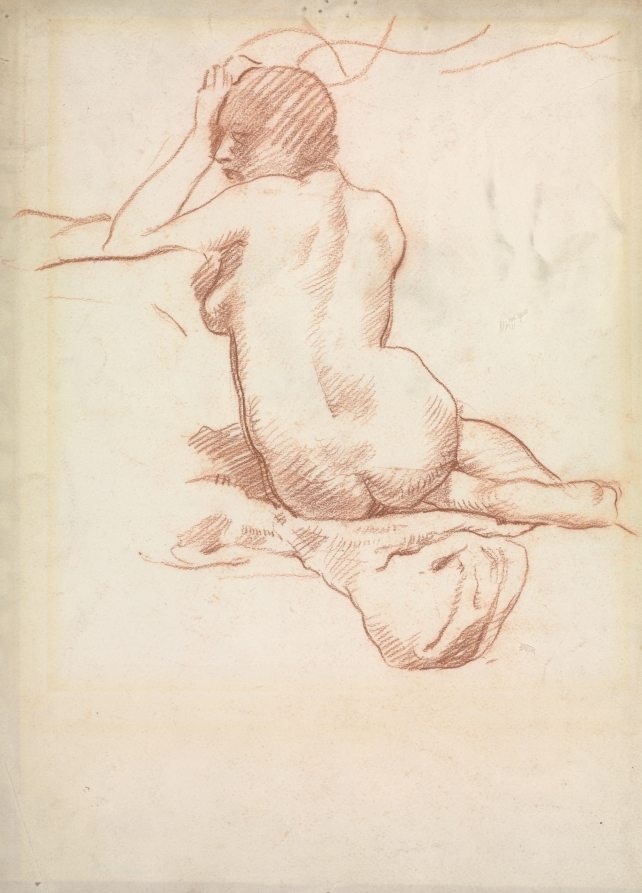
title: Seated Female Nude from the Rear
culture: England(?), 20th century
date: first half 1900s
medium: red chalk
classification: Drawing